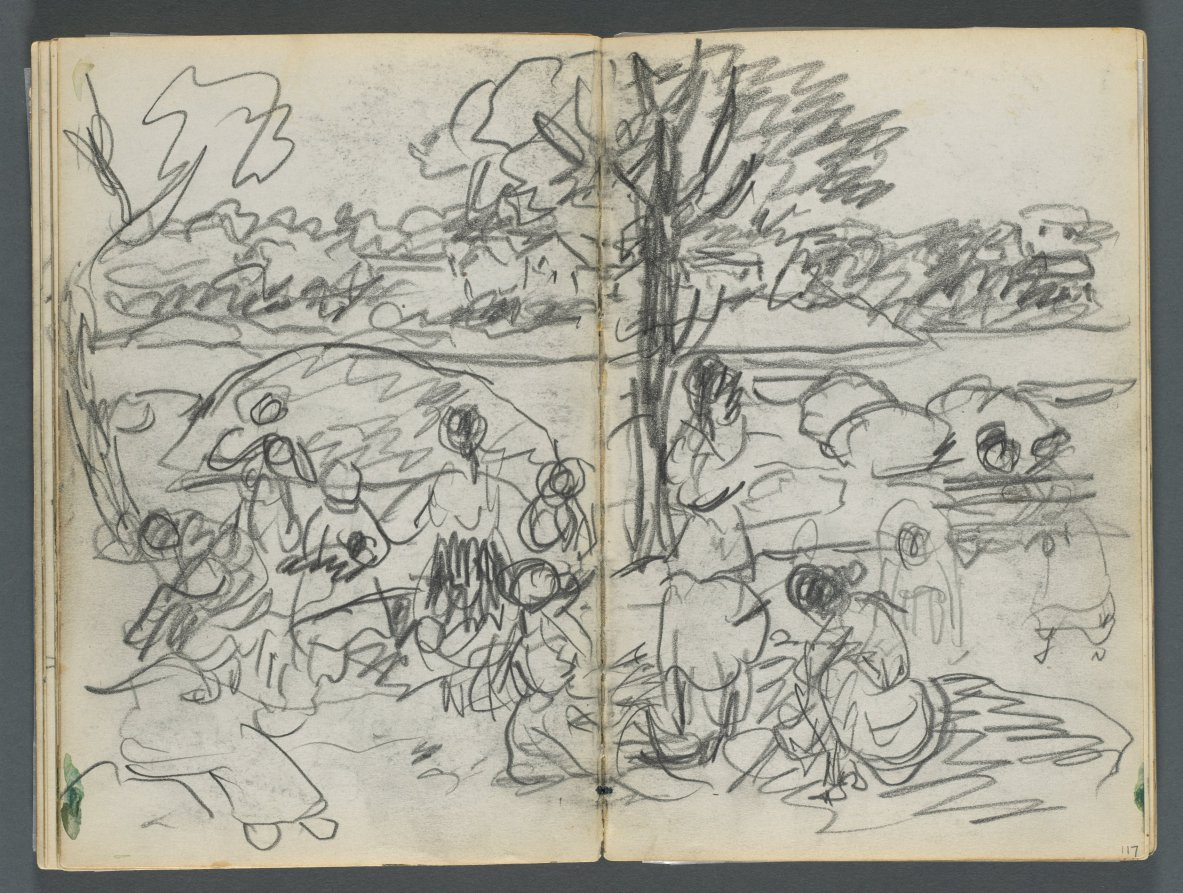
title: Sketchbook, The Dells, N° 127, page 116 & 117: Figure in a Landscape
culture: America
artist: Maurice Prendergast (American, born Newfoundland [now Canada], 1858–1924)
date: c. 1919–1921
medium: graphite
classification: Bound Volume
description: This sketchbook contains 59 pages of graphite drawings and 16 watercolors made at various locations on Cape Ann, Massachusetts.